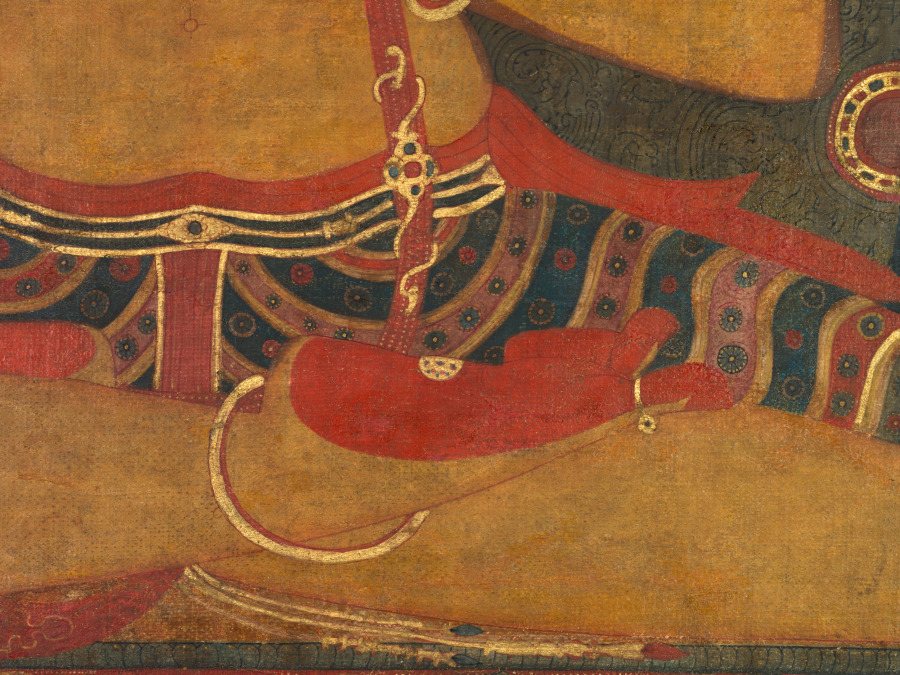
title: Tantric Buddha Vairochana as Vajrasattva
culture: Central Tibet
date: c. 1150–1200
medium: gum tempera, ink, and gold on cloth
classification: Painting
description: The seated Buddha dominating the composition is identified as Vairochana because of his hand gesture, the mudra communicating supreme enlightenment in which the index finger of one hand is grasped by the fingers of the opposite hand. His golden color and the tiny vajra—a six-pronged ritual object representing a thunderbolt—balanced on top of his finger suggest that he is in the guise of Vajrasattva, the summation of all enlightened beings. In his crown is the image of a monk, who is probably the guru of the donor, the small monastic figure at the lower right next to the lotus pedestal.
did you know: A mantra written behind the figures invokes their living presence in the thangka painting.